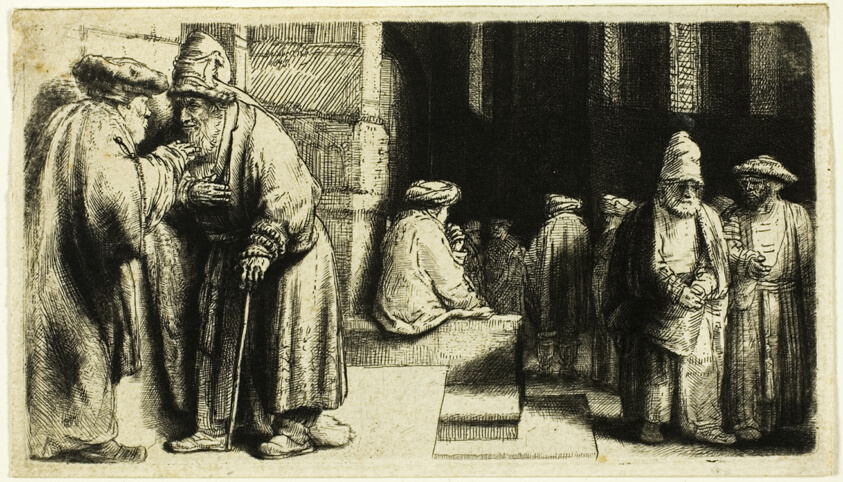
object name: Print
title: Jews in the Synagogue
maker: Rembrandt van Rijn (Dutch, 1606-1669)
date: 1648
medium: Etching and drypoint on ivory laid paper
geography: Holland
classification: etching; print; prints and drawing; paper; drypoint